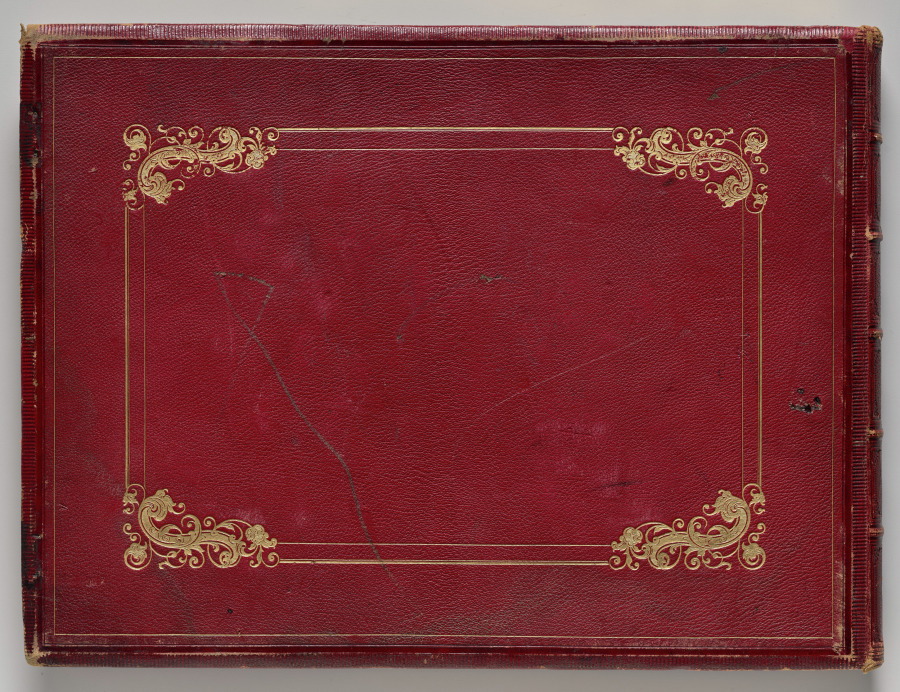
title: Photographs of Northern India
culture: England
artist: Samuel Bourne (British, 1834–1912)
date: 1863–70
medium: Album of 50 albumen prints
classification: Bound Volume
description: The 50 images in this album, all taken in the 1860s, move from the hill towns of the Himalayas down to cities including Lahore (now in Pakistan), Delhi, Lucknow, Agra, Benares (now Varansi), and Calcutta (now Kolkata). Architectural studies of major monuments offer valuable historical records of what sites such as the Taj Mahal and the imperial mosque of the Mughal emperors in Delhi looked like before twentieth-century restorations.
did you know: Samuel Bourne, the author of most the images in this album, was a banker in England before he moved to India to become a professional photographer.